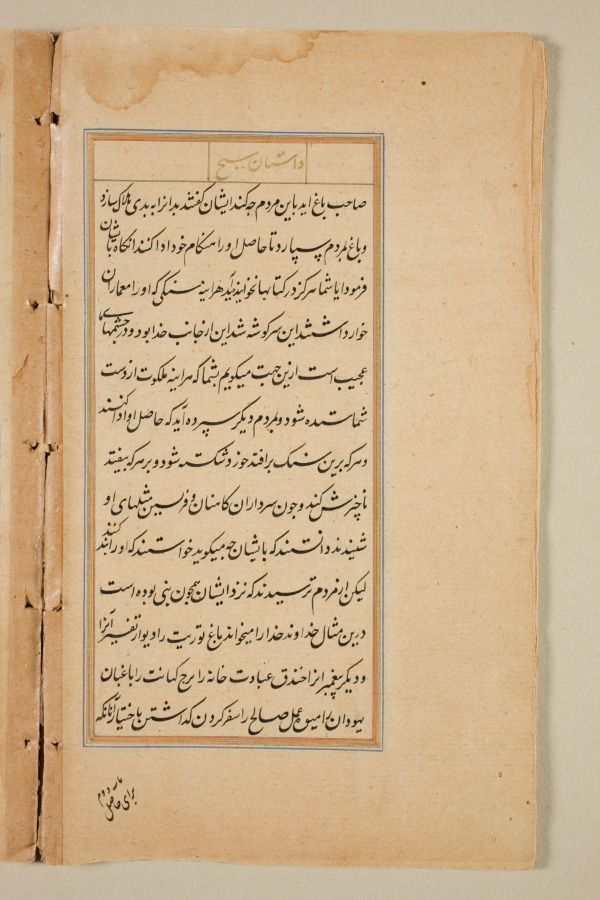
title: Text page from a Mirror of Holiness (Mir’at al-quds) of Father Jerome Xavier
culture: Mughal India, Allahabad, made for Prince Salim (1569–1627)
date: 1602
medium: Ink and gold on paper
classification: Manuscript